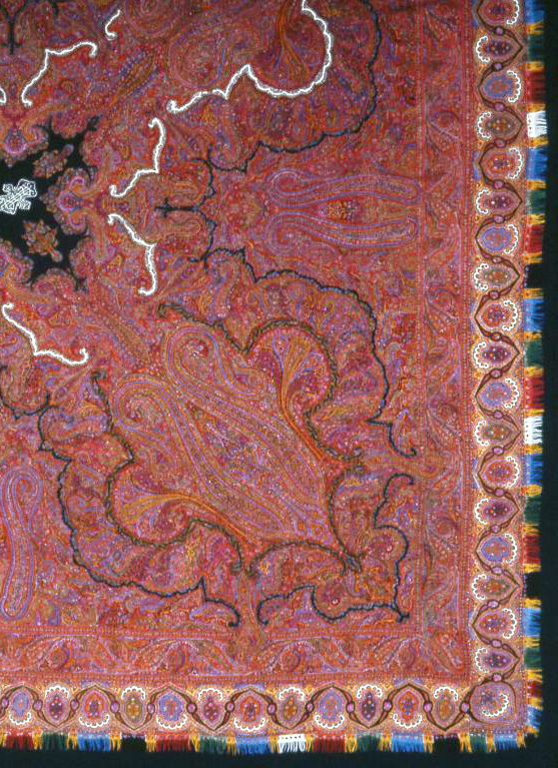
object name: Costume and Accessories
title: Shawl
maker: India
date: 1867/77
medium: Wool, patchwork of double interlocking 2:2 'S' twill tapestry weaves; outer border and "Harlequin" tabs of patchwork in 2:2 'S' and 'Z' twill weaves; embroidered in flat, satin, and stem stitches; couching; main warp fringe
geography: India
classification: textile; weaving; needlework (visual works); costume